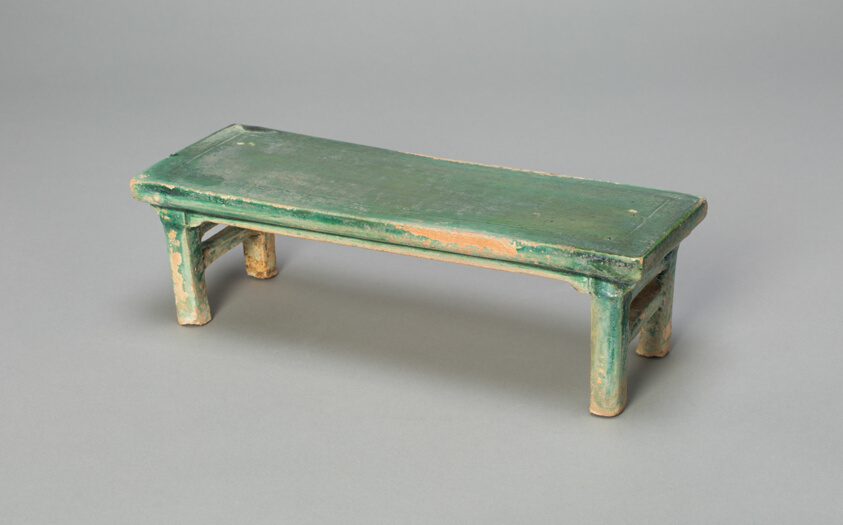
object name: Sculpture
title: Miniature Bench (Mingqi)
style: Chinese (culture or style)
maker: China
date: Ming dynasty (1368–1644)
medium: Earthenware with green glaze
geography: China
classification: earthenware; asian art; ceramics; sculpture